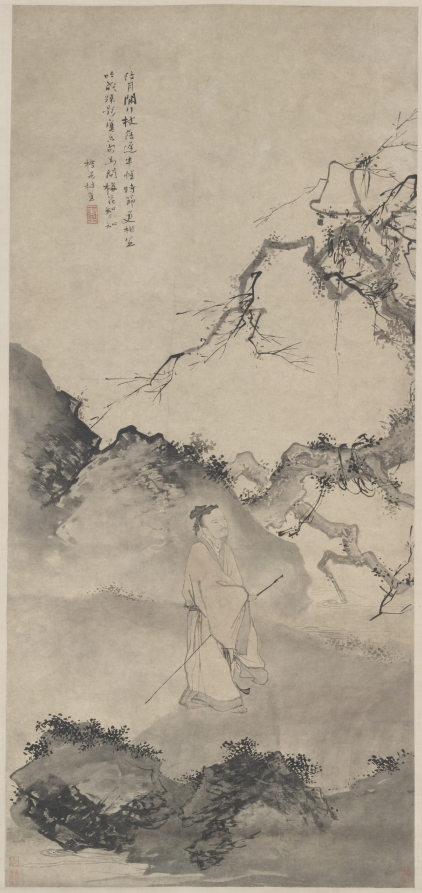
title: The Poet Lin Bu Wandering in the Moonlight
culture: China, Ming dynasty (1368–1644)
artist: Du Jin (Chinese, 1446-c. 1519)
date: late 1400s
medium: Hanging scroll; ink and color on paper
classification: Painting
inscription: 陪月閒行杖屨遲，半醒時節更相宜。 吟成疏影寒香句，為問梅花知不知。 檉居杜堇 [印]一書生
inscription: 1 seal of Zhang Heng 張珩 (1915–1963)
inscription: 1 seal of C. C. Wang [Wang Jiqian] 王季遷 (1907–2003)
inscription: 1 unidentified seal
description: Lin Bu (967–1028), a Northern Song (960–1127) poet and hermit who lived at the West Lake in Hangzhou, was known for having plum trees for his female companions and cranes for his children. This hanging scroll depicts the poet walking in the moonlight and looking at the plum tree, a scene described in his most well-known poem on plum blossoms. Surviving works signed by Du Jin are rare and this painting is one of them. Here, the artist used lively brushwork to depict the plum tree and rocks, exemplified in varying dots and strokes, and sweeps in different shades of ink.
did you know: Lin Bu withdrew from prestigious government service and lived as a hermit by the West Lake in Hangzhou.